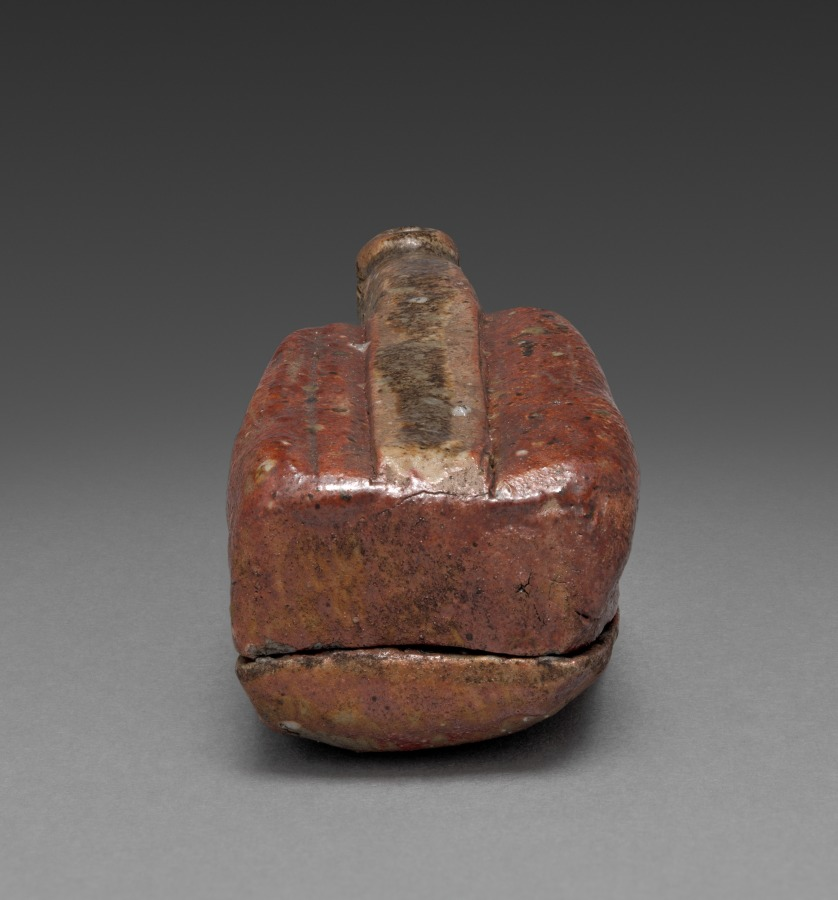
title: Ink Box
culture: Japan, Edo period (1615–1868)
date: early to mid-1800s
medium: pottery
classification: Ceramic